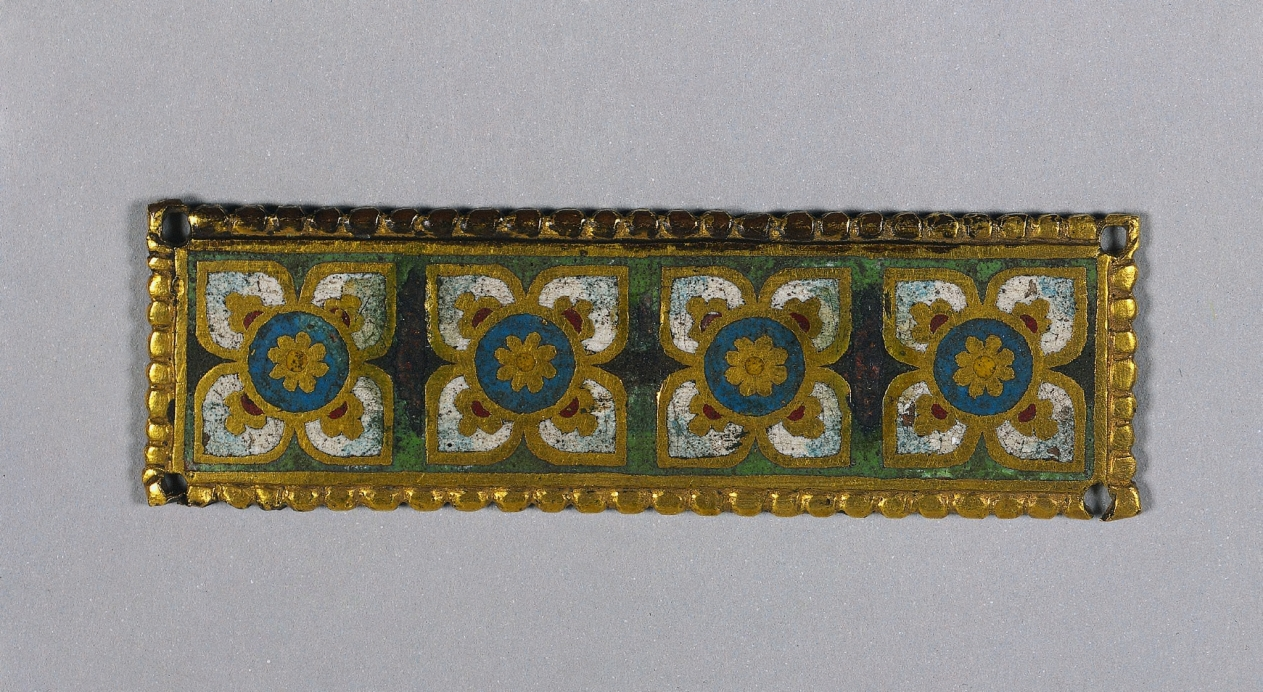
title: Plaque, probably from a Reliquary Shrine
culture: Mosan, Valley of the Meuse, Gothic period, mid-13th century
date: c. 1200–1250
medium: gilded copper; champlevé enamel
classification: Enamel